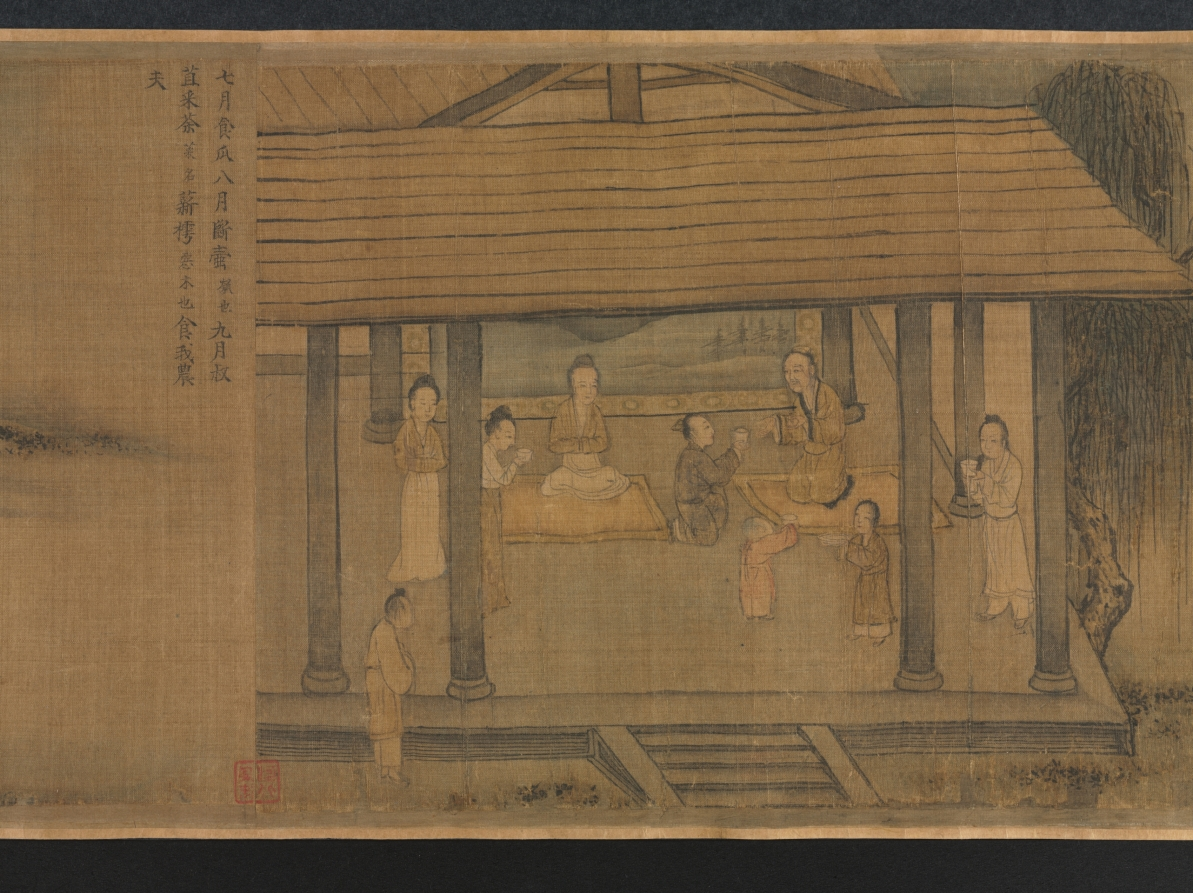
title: "Seventh Month" from the Odes of Bin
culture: China, Southern Song dynasty (1127-1279)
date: 1200s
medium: Handscroll; ink and color on silk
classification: Painting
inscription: Colophons: 1. [on the frontispiece] by the Qianlong emperor (dated 1741). 2. by Lu Wan (dated Zhengde dingchou, 1517). 2. by the Jiaqing emperor (dated 1807).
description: According to Confucian thought, the ruler looks after the well-being of his people which involves agricultural activities. Seventh Month from the ancient Odes of Bin in the Shijing (Book of Poetry) describes occupations throughout the year, including plowing, harvesting, hunting, making clothes, and observing rituals. The earliest illustrations of these Odes accompanied by text were commissioned by Southern Song emperor Gaozong (reigned 1127–1162). As the lower Yangzi delta had become the new seat of government, Gaozong had sets of these illustrations produced by court artists to revive the dynasty and convince the Confucian officialelite of his legitimacy to rule.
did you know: The Odes of Bin appears in the classic Shijing (Book of Poetry), an anthology of more than 300 poems, folk songs, and ceremonial hymns that were originally chanted to music.